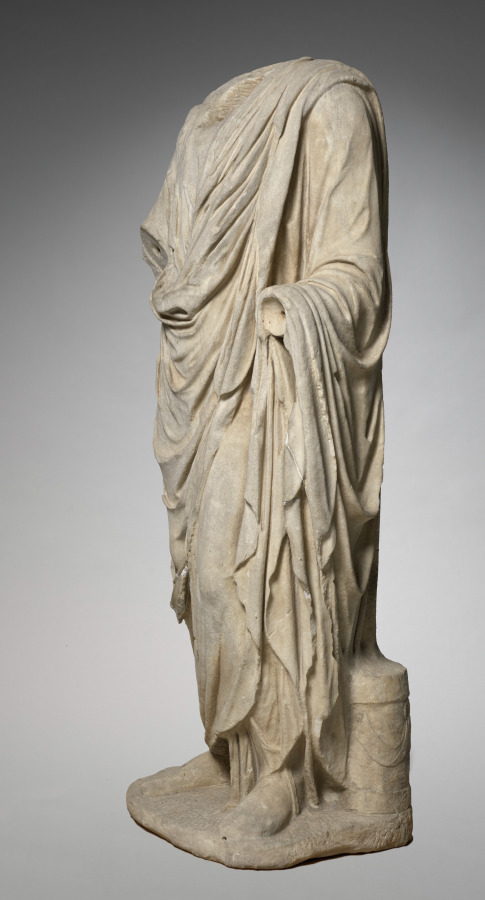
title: Togatus Figure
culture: Italy, Roman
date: 1–200 CE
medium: pentelic marble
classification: Sculpture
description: From 1929 until 1973, this toga-clad body was displayed with a portrait head of Vespasian (recarved from Nero) that did not originally belong to it. Several details indicate a mismatch: the surfaces and proportions differ, and the head projected awkwardly forward even after modern recarving of the neck to fit into the body cavity. Aspects of the toga also suggest that it was sculpted later than the head.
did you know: This body once included a separately made head and arms.